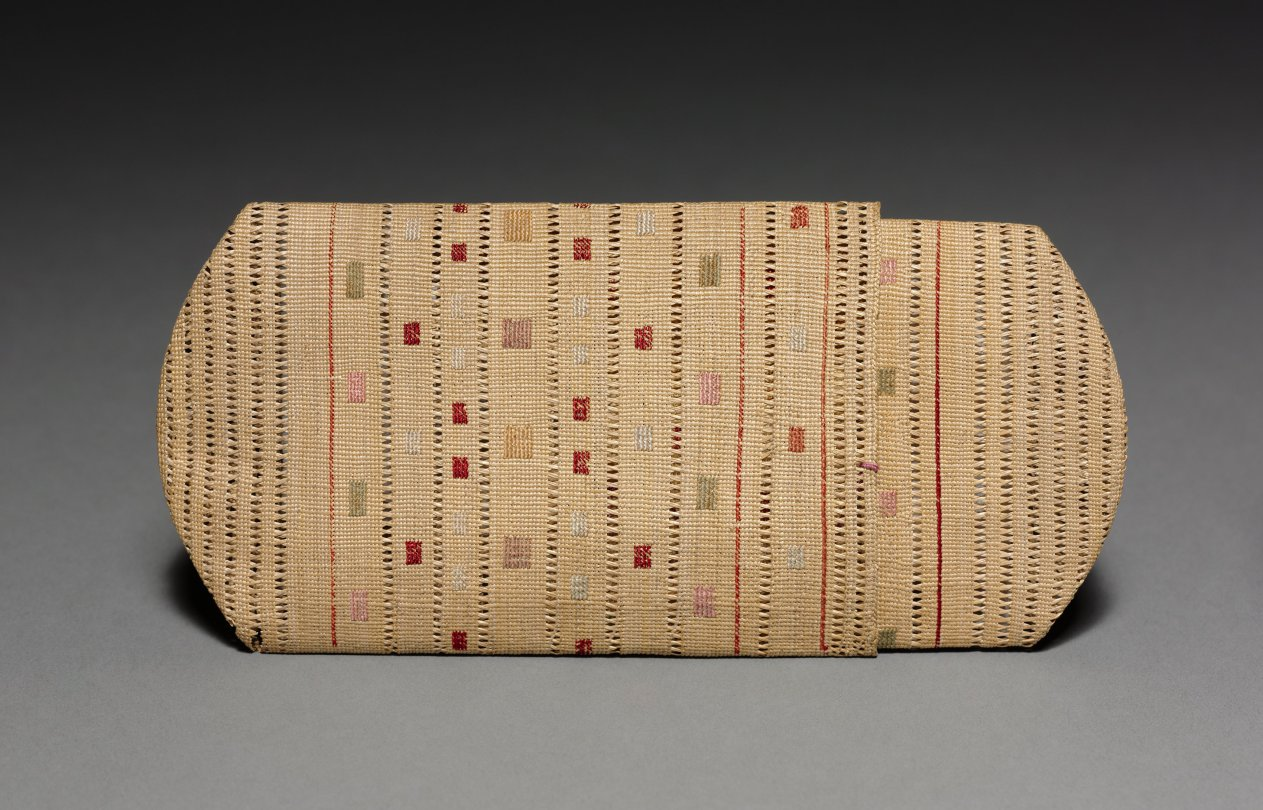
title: Cigarette or Needle Case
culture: Arctic, Aleut, Attu, Post-Contact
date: c 1875– 1917 (source unknown)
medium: plain twine, wild rye grass with crossed openwork, patterned twined start, intersecting layered spokes, and plaited finish; silk embroidery (catalogue card)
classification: Basketry